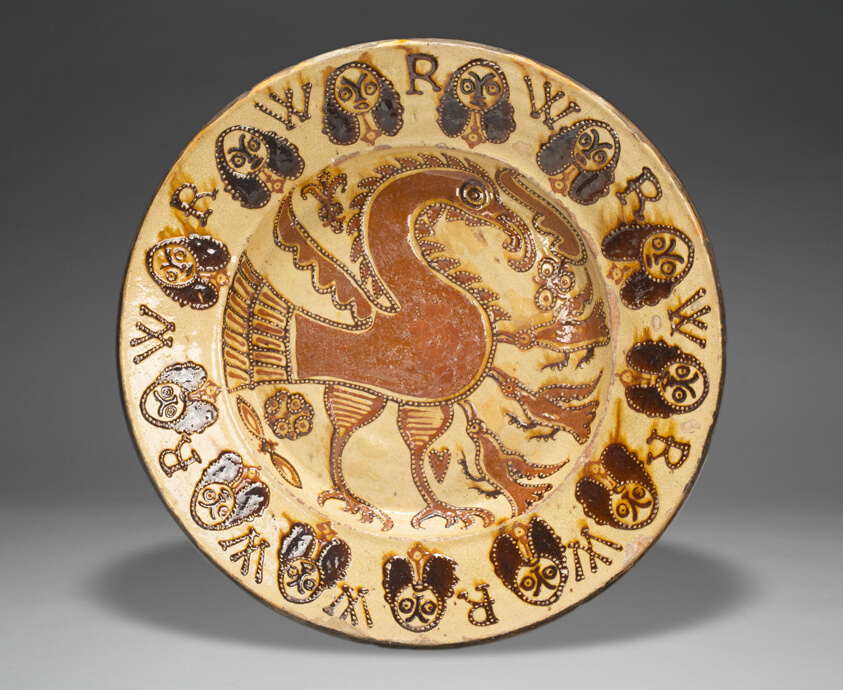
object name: Ceramics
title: Dish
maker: Staffordshire, England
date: 1690–1710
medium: Lead-glazed earthenware with slip decoration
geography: Staffordshire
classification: dish (vessel); earthenware; european decorative arts; ceramics